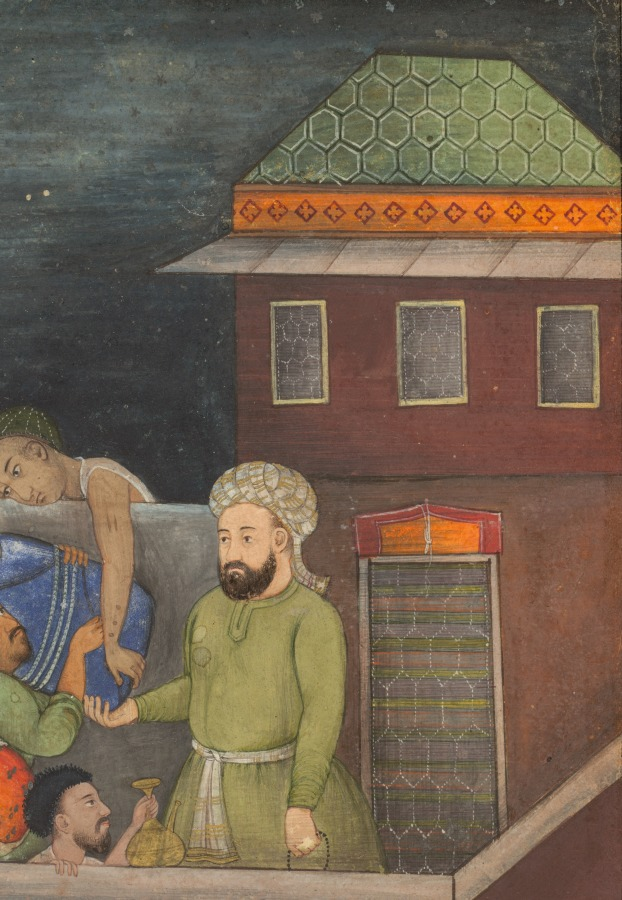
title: A House Burgled at Night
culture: Mughal India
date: c. 1700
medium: Gum tempera and gold on paper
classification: Painting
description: In this night scene a band of robbers have climbed over the walls of a Mughal house and, from a courtyard, are successfully carrying out the possessions of its owners while a lady flees through the door. The speed of her movement is expressed in the swinging motion of her diaphanous skirt and the scarf clutched in her hand, as well as by the shoes abandoned on the ground in her haste. This depiction of unruly behavior and its effects are perhaps an expression of the violent succession of emperors that threw the Mughal court into distress at the beginning of the 18th century.